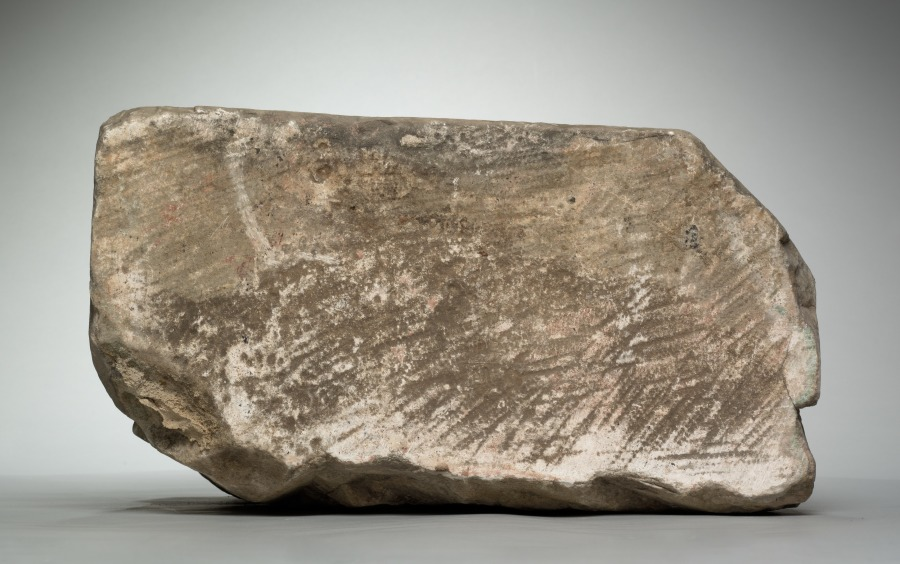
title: Double Column Base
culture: France, late 15th century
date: late 1400s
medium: marble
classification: Sculpture